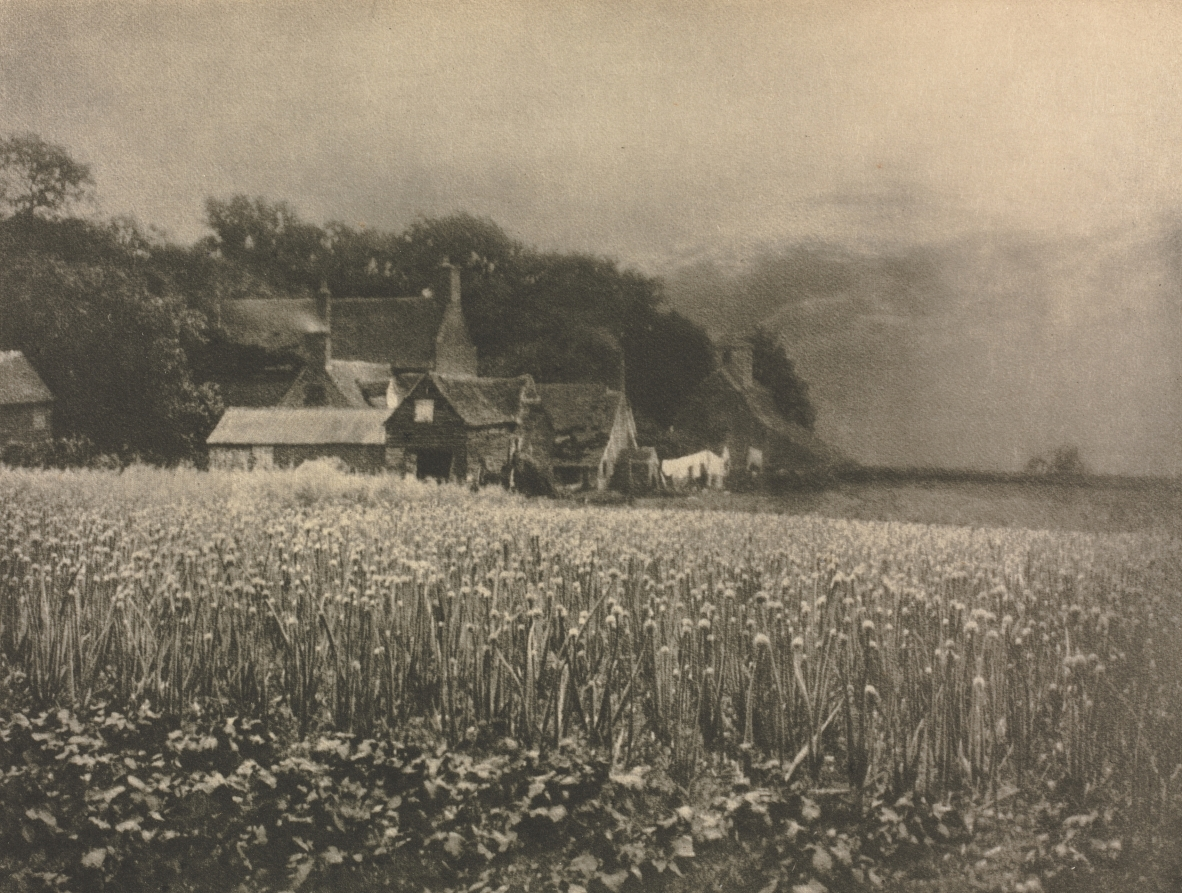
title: Camera Work: The Onion Field - 1890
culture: England, 19th century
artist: George Davison (British, 1856–1930)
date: 1890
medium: photogravure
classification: Bound Volume